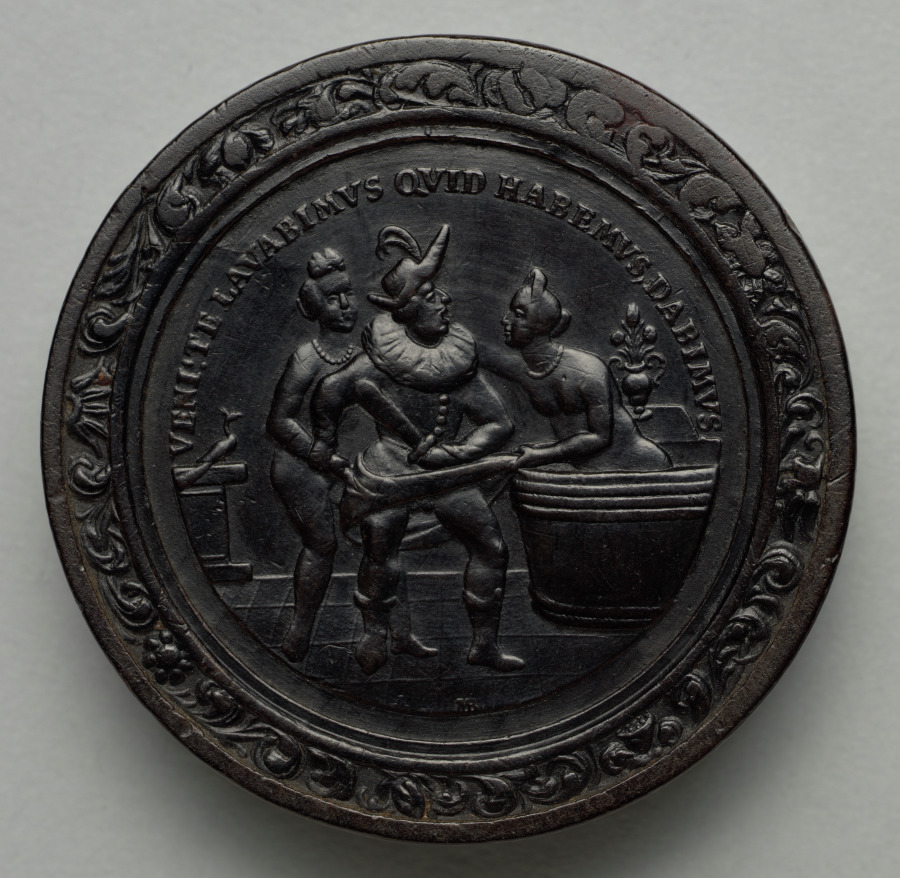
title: Gaming Piece (reverse)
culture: Germany, late 17th-early 18th Century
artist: Martin Brunner (German, 1659–1725)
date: c.1700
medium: wood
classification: Furniture and woodwork